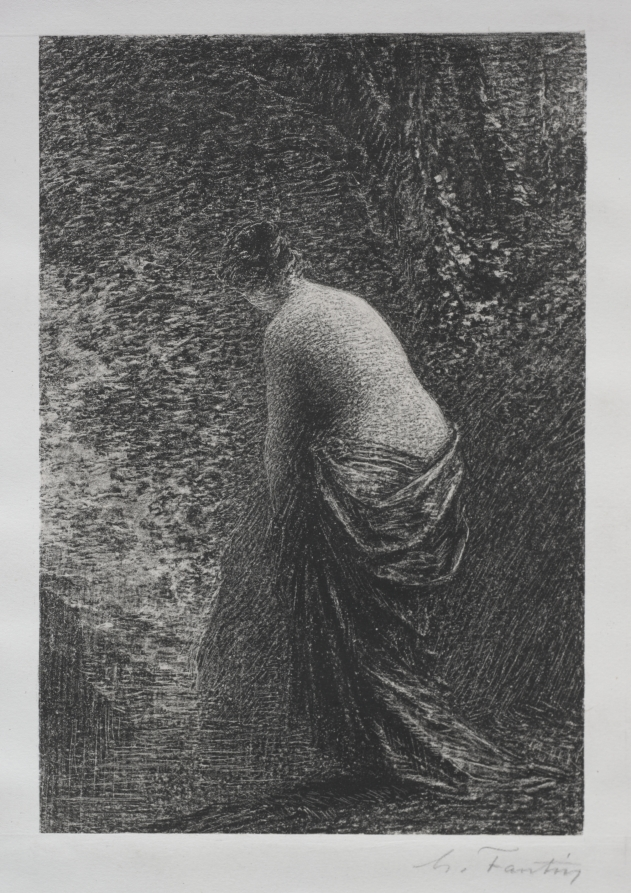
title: Bather Standing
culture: France, 19th century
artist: Henri Fantin-Latour (French, 1836–1904)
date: 1879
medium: lithograph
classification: Print